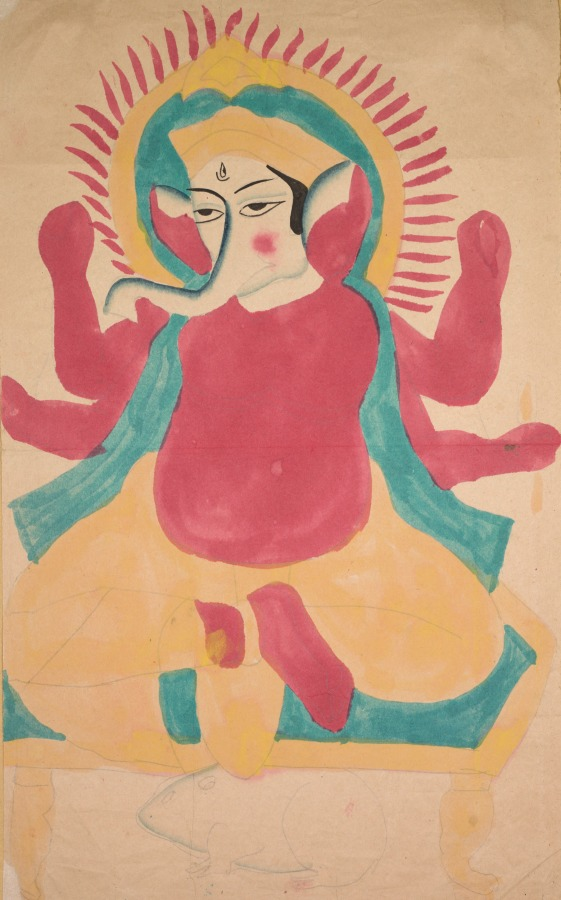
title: Ganesha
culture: Eastern India, Bengal, Kolkata, Kalighat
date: c. 1890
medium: Gum tempera, graphite, and ink on paper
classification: Painting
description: Ganesh, seated here in these two images on his vehicle, the mouse, is the ever-popular elephant-headed deity who is worshipped as the mischievous Lord of Beginnings and Remover of Obstacles. Hindus worship him before they begin journeys, at the start of the day, and at the beginning of any auspicious occasion. Ganesh is the son of Shiva and Parvati, Shiva’s wife, and is fashioned from the dirt of her body. At his mother’s request, Ganesh guarded her as she bathed, only to be confronted by Shiva, Parvati’s husband, who was refused entry. Enraged (and not knowing that Ganesh was his son), Shiva beheaded him and entered. Parvati demanded that Ganesh be restored. To appease his wife, Shiva sent his attendants to return with the head of the first creature they encountered. They returned with the head of an elephant. The image on the wall is unfinished, revealing the technique of painting in stages employed by Kalighat artisans.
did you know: An outline of Ganesh's vehicle, the rat, is under his seat.